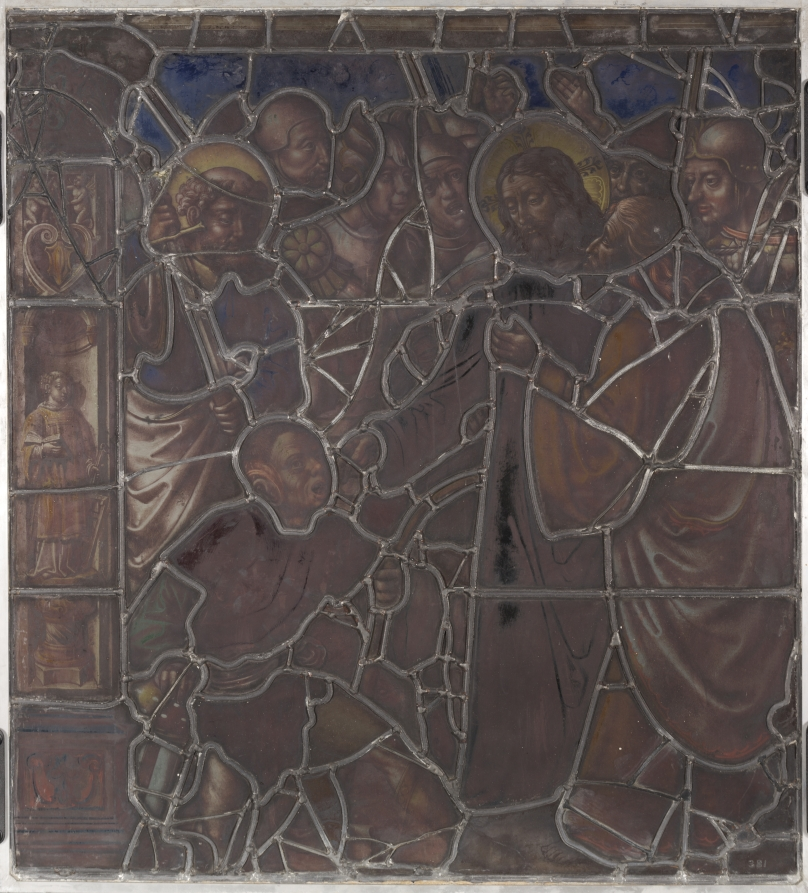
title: The Kiss of Judas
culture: Germany, Cologne, 16th century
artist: Everhard Rensig (German)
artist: or Gerhard Remisch (German)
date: 1522–1526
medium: pot-metal and white glass, silver stain and sanguine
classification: Glass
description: These two stained glass panels originally belonged to an extensive program of Old and New Testament subjects that originally decorated the cloister of the Cistercian Abbey of Mariawald, near Cologne. The original placement of glass at Mariawald involved windows composed of two openings. Each comprised three large glass panels plus a smaller tracery panel. Two scenes in each window represented Old Testament subjects (below) and the New Testament (above). Above the biblical narrative panels were smaller messenger panels depicting images of prophets with scrolls. At the base of each window were donor and patron saint panels. In this way, the Old Testament was shown to prefigure the events of the New. These two panels depicting scenes of Christ’s Passion were originally located in the north corner of the east cloister gallery with the Kiss of Judas on the left, and Christ in Gethsemane on the right. Mariawald was founded in 1480 and closed in 1802 when the stained glass windows were removed. Recent scholarship has attributed the glass to the Rhenish glass painters Everhard Rensig or Gerhard Remisch.